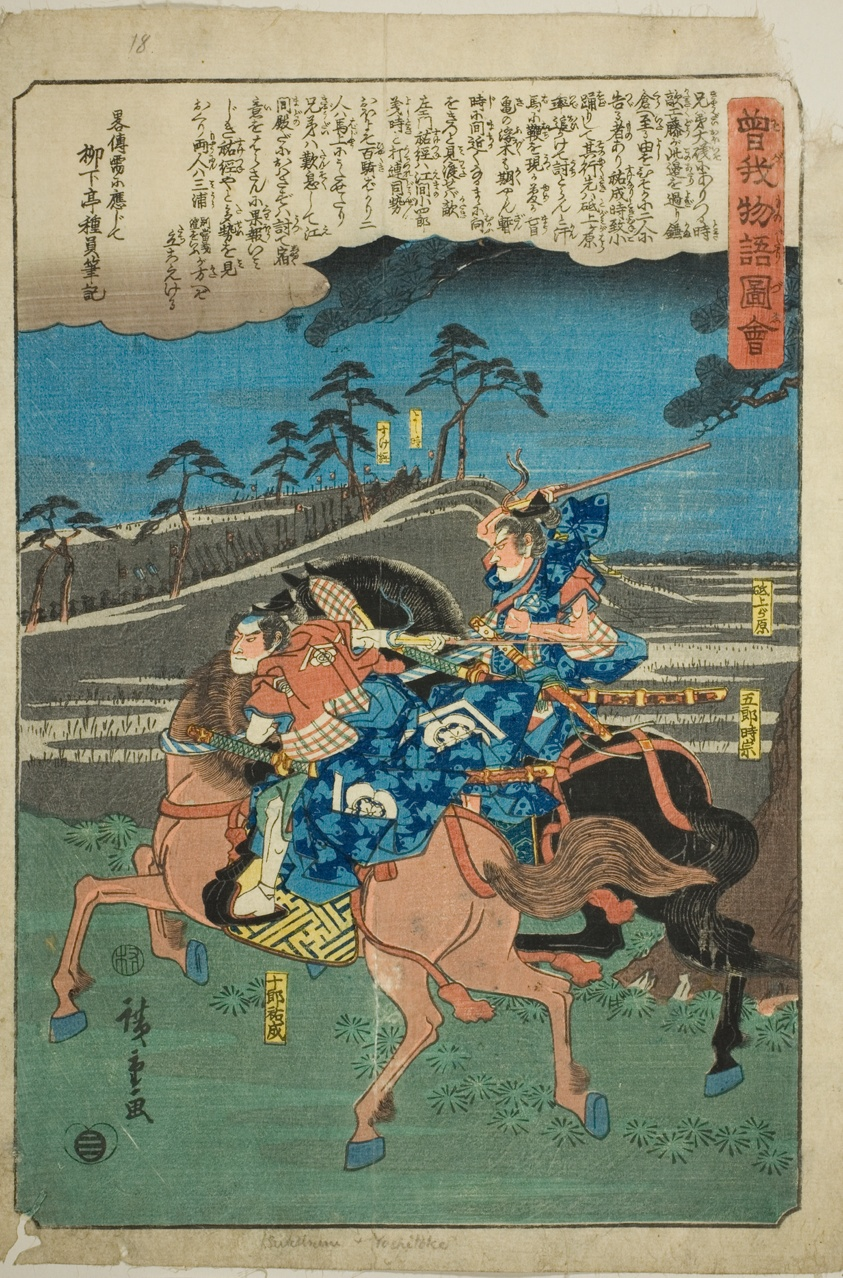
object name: Print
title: Goro Tokimune and Juro Sukenari on horseback, from the series "Illustrated Tale of the Soga Brothers (Soga monogatari zue)"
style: Japanese (culture or style)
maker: Utagawa Hiroshige 歌川 広重; Japanese, 1797-1858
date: c. 1843/47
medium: Color woodblock print; oban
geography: Japan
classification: woodblock print; print; asian art